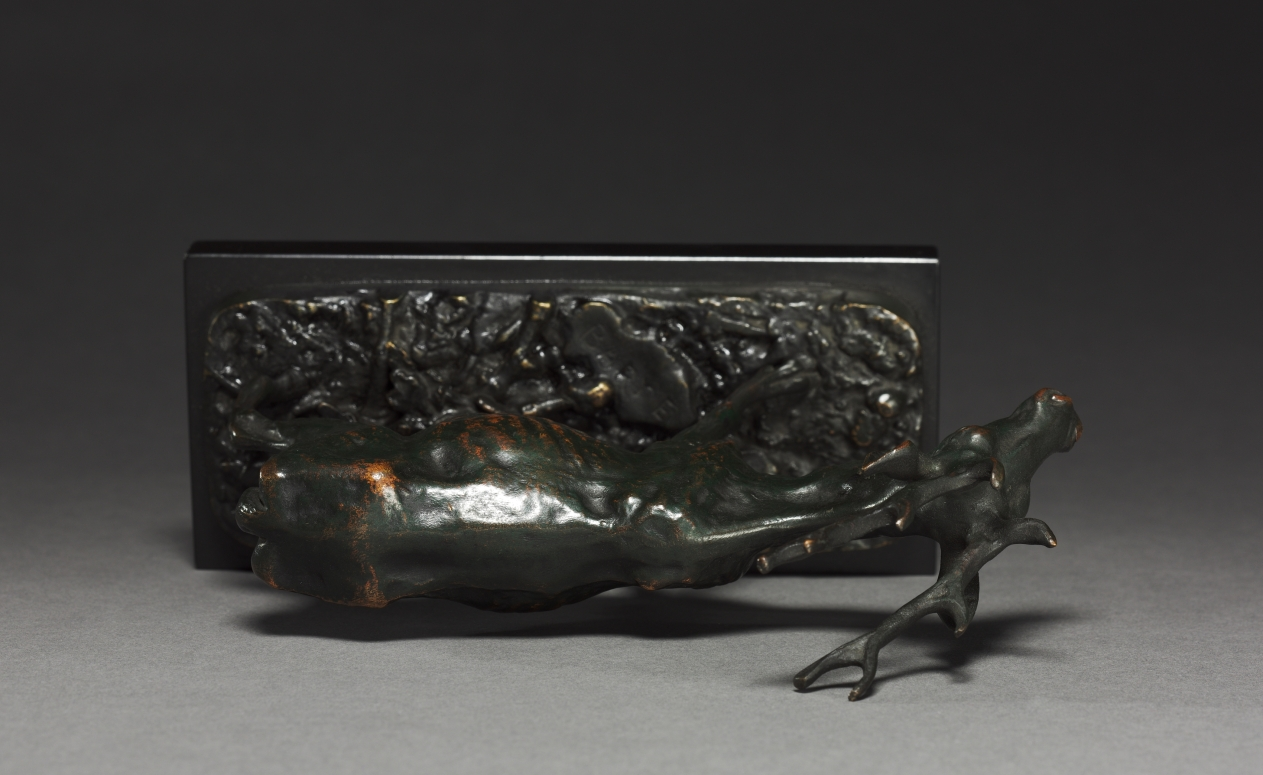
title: Deer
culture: France, 19th century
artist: imitator of Antoine-Louis Barye (French, 1796–1875)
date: after 1830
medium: bronze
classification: Sculpture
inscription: Signed: "Barye"